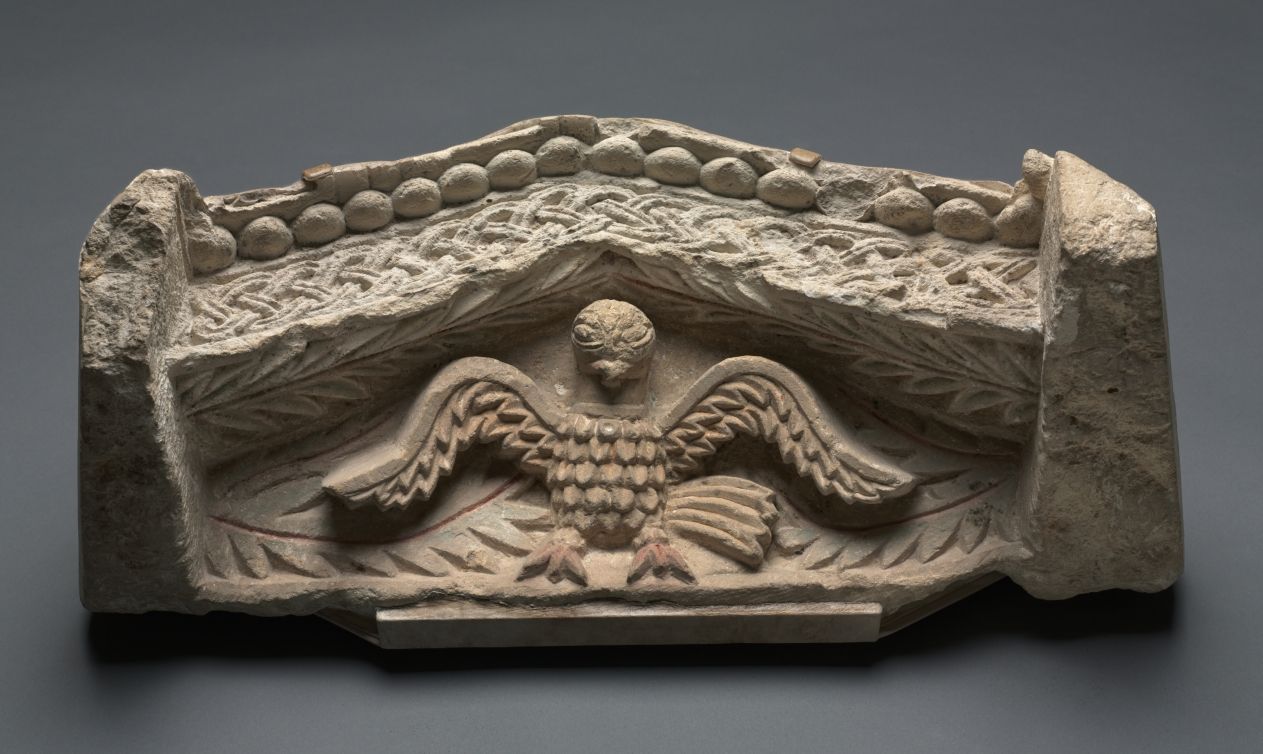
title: Pediment with an Eagle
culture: Egypt, Coptic period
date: 400s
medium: limestone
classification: Sculpture